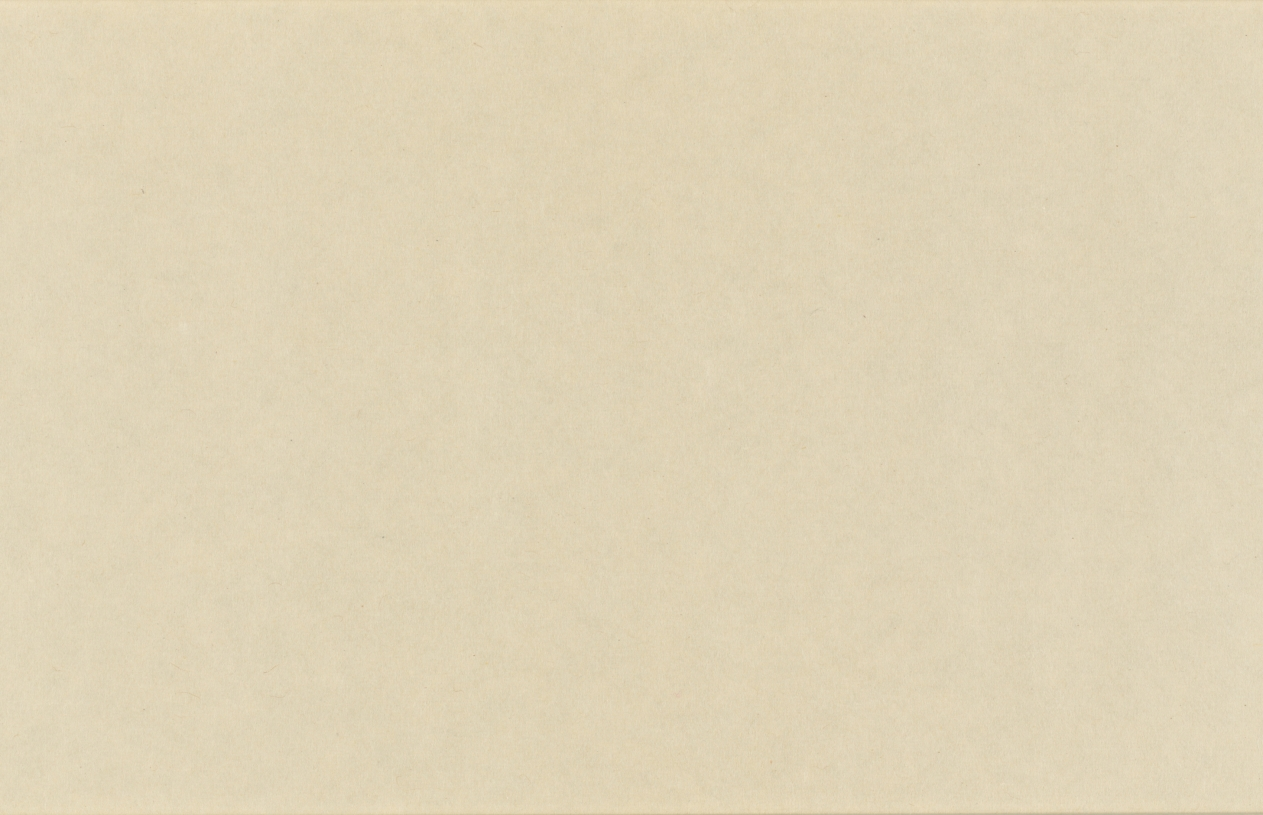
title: Eight Views of Xiao-Xiang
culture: Japan, Muromachi period (1392–1573)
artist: Sesson Shūkei (Japanese, c. 1492–c. 1577)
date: 1500s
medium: handscroll; ink on paper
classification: Painting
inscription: Signature and seal of artist at end of painting.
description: Eight Views of the Xiao and Xiang Rivers can be traced to 11th-century Chinese poems and paintings, the depiction of which had also become popular among Korean and Japanese painters. Xiao-Xiang refers to the region in present-day Hunan province where the Xiao and Xiang rivers converge. Few painters of the Eight Views had in fact seen the scenery; rather, they were trying to portray in ink and wash the lyrical qualities of dim light and a misty atmosphere typical of that region. Each of the poetic titles suggests a time of day, a season, or specific atmospheric conditions—subjects that challenged the abilities of the most talented artists. In this miniature painting (shukuzu) of the Muromachi period, Japanese Zen monk and painter Shukei Sesson depicted all eight views featured in Chinese prototypes: Wild Geese Descending to Sandbar; Returning Sails Off a Distant Coast; Mountain Market in Clearing Mist; River and Sky in Evening Snow; Autumn Moon over Dongting Lake; Night Rain on the Xiao and Xiang; Evening Bell from Mist-Shrouded Temple; and Fishing Village in Evening Glow.